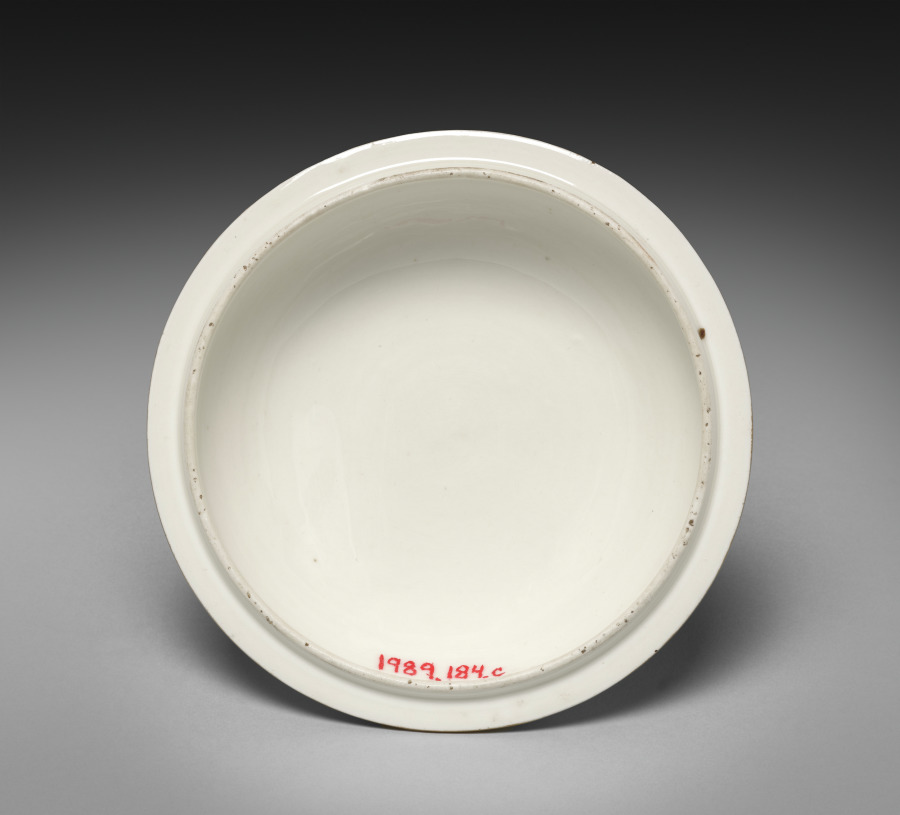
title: Food Warmer (Veilleuse) [Food Container Cover]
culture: Germany, Nymphenburg, 18th century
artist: Meissen Porcelain Factory (German, est. c. 1710)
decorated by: probably by Georg Christoph Lindemann (German)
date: c. 1758–1760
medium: porcelain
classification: Ceramic